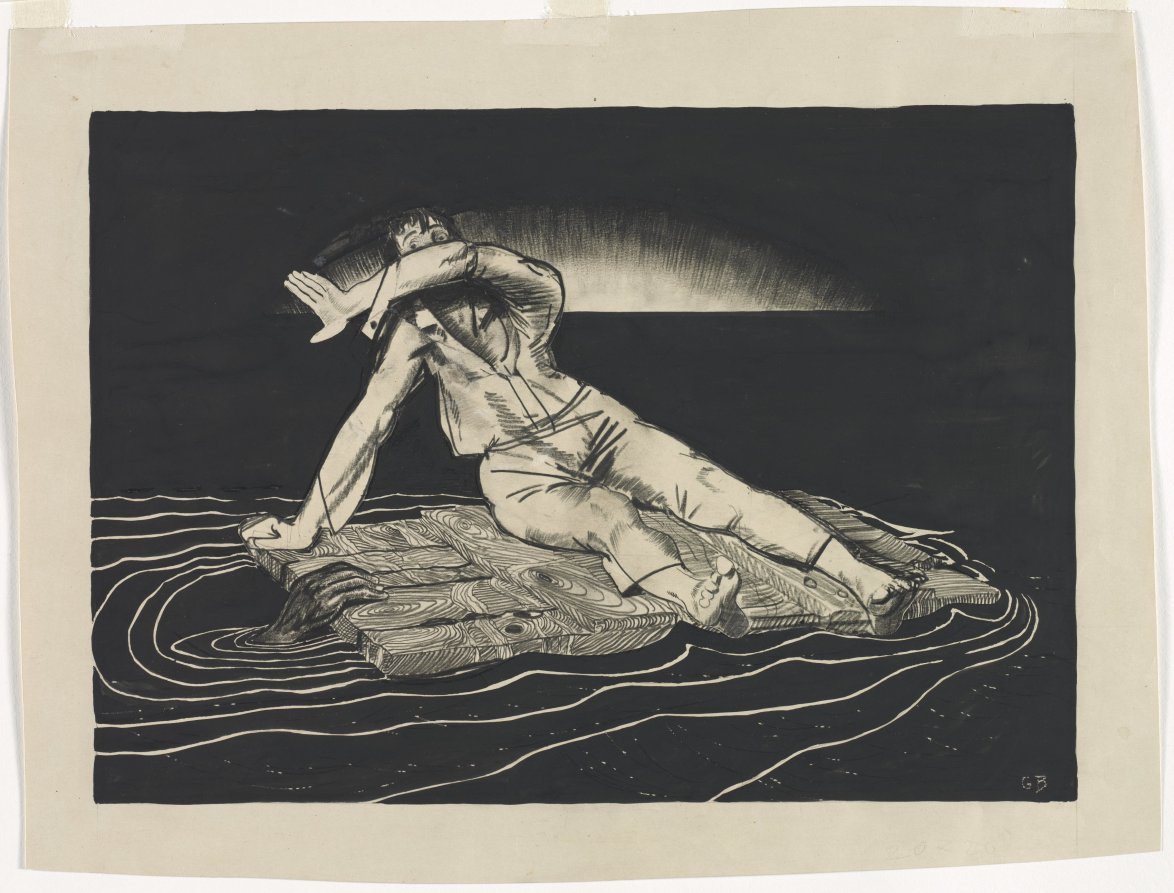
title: On a Raft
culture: America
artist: George Bellows (American, 1882–1925)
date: c. 1900–1923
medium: pen and ink and brush and conté crayon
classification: Drawing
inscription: Lower right corner, monogram G.B. scratched through ink